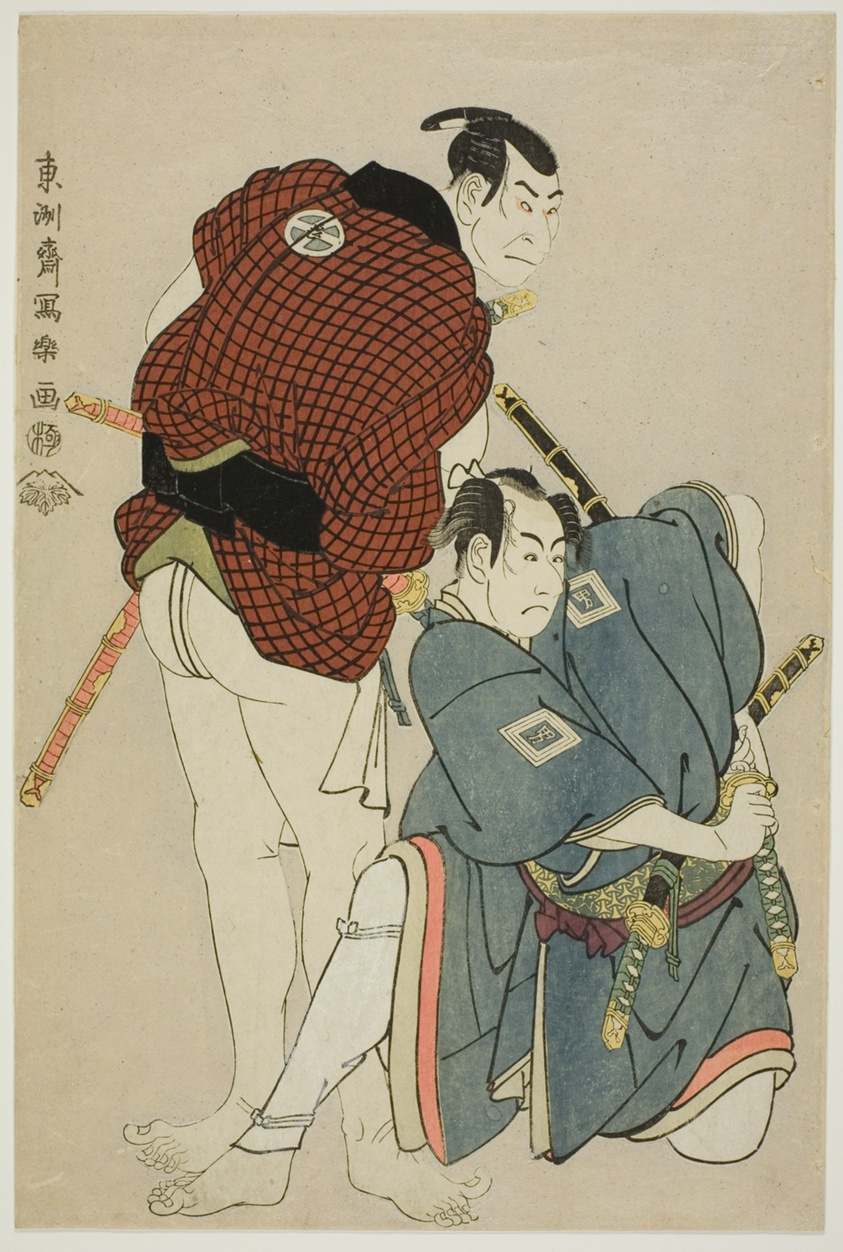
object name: Print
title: The actors Ichikawa Omezo I (R) as Tomita Hyotaro and Otani Oniji III (L) as Kawashima Jibugoro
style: Japanese (culture or style)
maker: Toshusai Sharaku 東洲斎 写楽; Japanese, active 1794-95; Publisher: Tsutaya Juzaburo; Japanese, 1748-1797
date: 1794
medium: Color woodblock print; oban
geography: Japan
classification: print; asian art